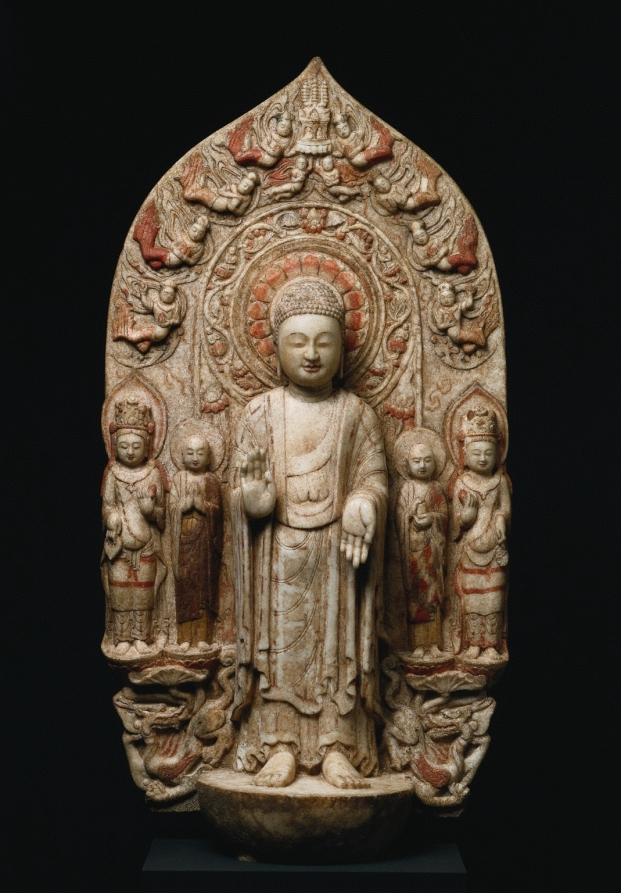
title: Stele with Shakyamuni and Maitreya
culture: China, Northern Qi dynasty (550-577)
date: c. 570s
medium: marble with polychromy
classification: Sculpture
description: In this stele, Shakyamuni (the historical Buddha) bears a benign smile in the hand gestures of fearlessness and gift giving. He is flanked by two bodhisattvas and two disciples-all standing against a mandorla (almond-shaped halo) adorned with a stupa and flying heavenly beings. On the reverse side, the Buddha sits in a pensive pose with his head tilted, mediating under twin sala trees. This position is reserved for Shakyamuni’s first meditation or Maitreya’s meditation. The joint appearance of Shakyamuni and Maitreya (the future Buddha) on two sides of a stele was a favorite scheme of the Northern Qi period.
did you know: Shakyamuni, or the historical Buddha, was a prince who gave up his earthly possessions for spiritual transcendence.